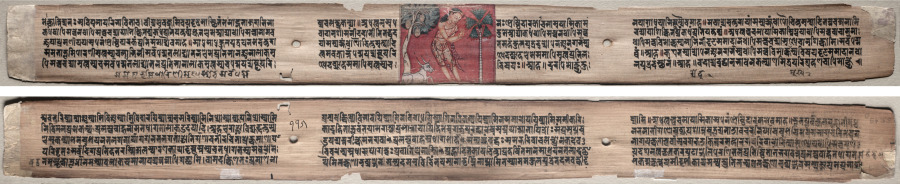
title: Folio 115 from a Gandavyuha-sutra (Scripture of the Supreme Array): Sudhana and a buffalo (recto); text (verso)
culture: Nepal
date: 1000–1100s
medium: gum tempera and ink on palm leaf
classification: Painting